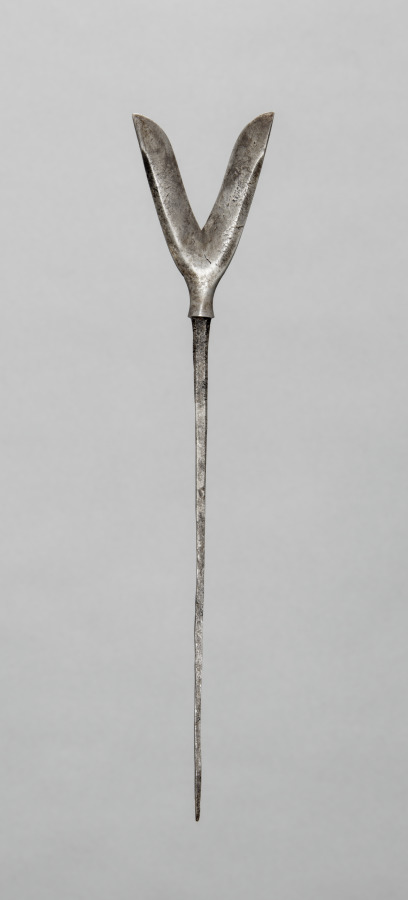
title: Arrow Point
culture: Japan, Edo period (1615–1868)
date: 1700s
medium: steel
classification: Arms and Armor